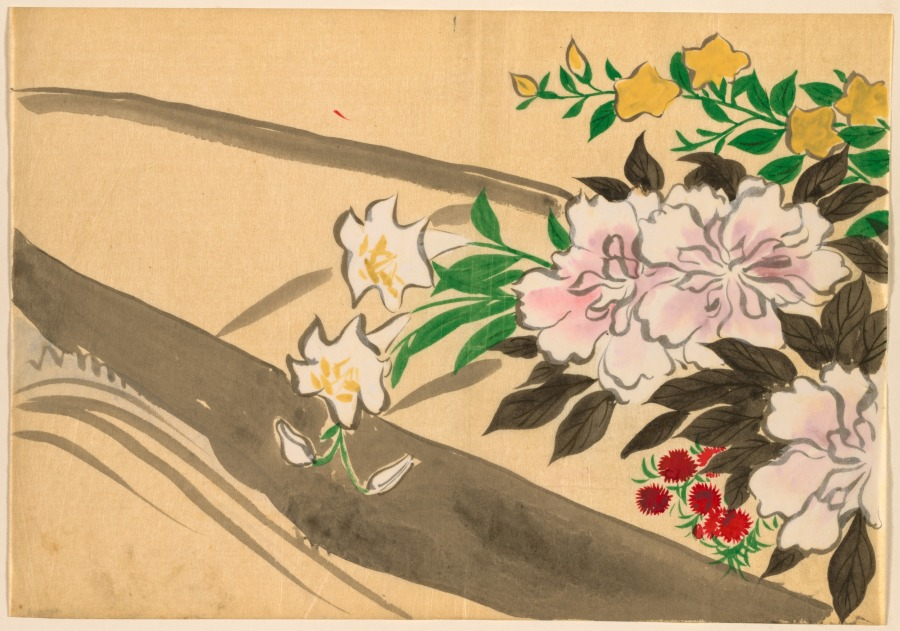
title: Flowers of a Hundred Worlds (Momoyogusa): Flower boat (Hanabune)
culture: Japan, Meiji period (1868–1912)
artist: Kamisaka Sekka (Japanese, 1866–1942)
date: 1909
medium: ink and color on paper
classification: Drawing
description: Kamisaka Sekka made preparatory drawings for his Flowers of a Hundred Worlds series on tracing paper with ink and color. The freehand sketches are much looser than the finished, printed compositions.